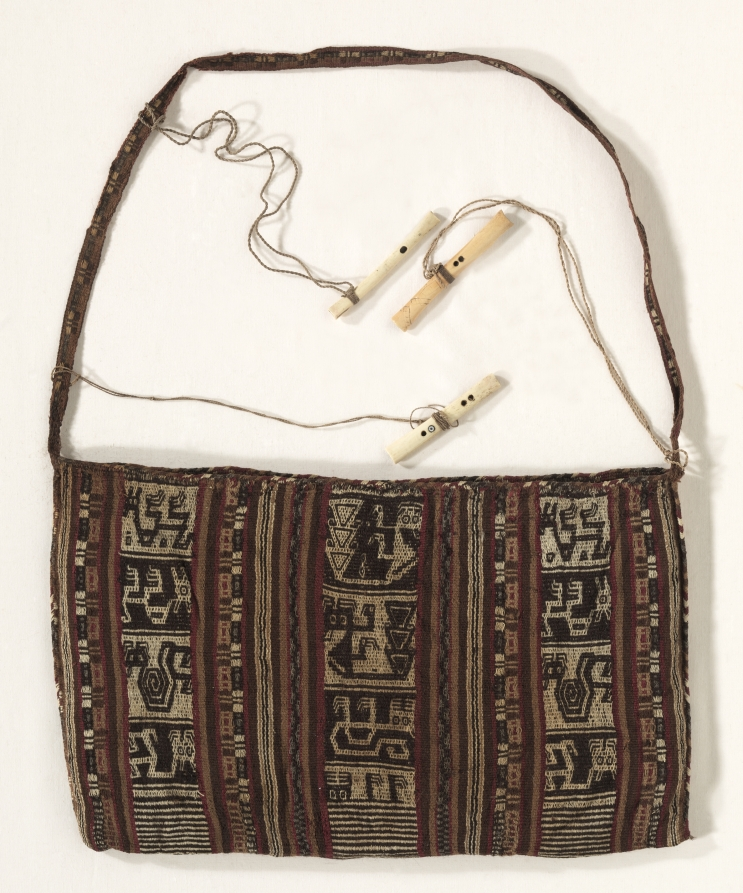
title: Textile Bag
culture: Peru, Central Coast, Chancay, Pachacamac, 12th-15th century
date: c. 1100–1400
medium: tabby weave, warp patterned; wool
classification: Textile